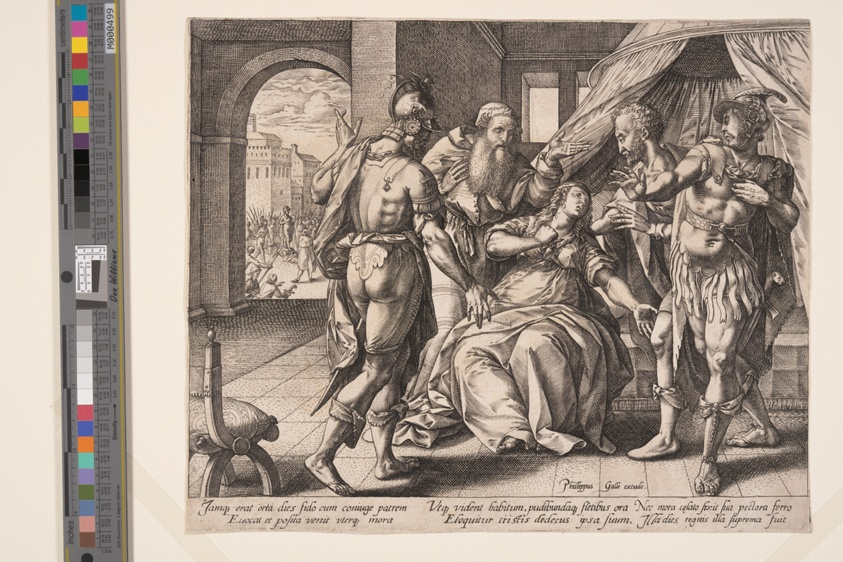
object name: Print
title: Lucretia Killing Herself, from The Story of Lucretia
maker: Hendrick Goltzius (Dutch, 1558–1617)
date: 1578–79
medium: Engraving on laid paper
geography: Netherlands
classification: print; engraving; paper; prints and drawing